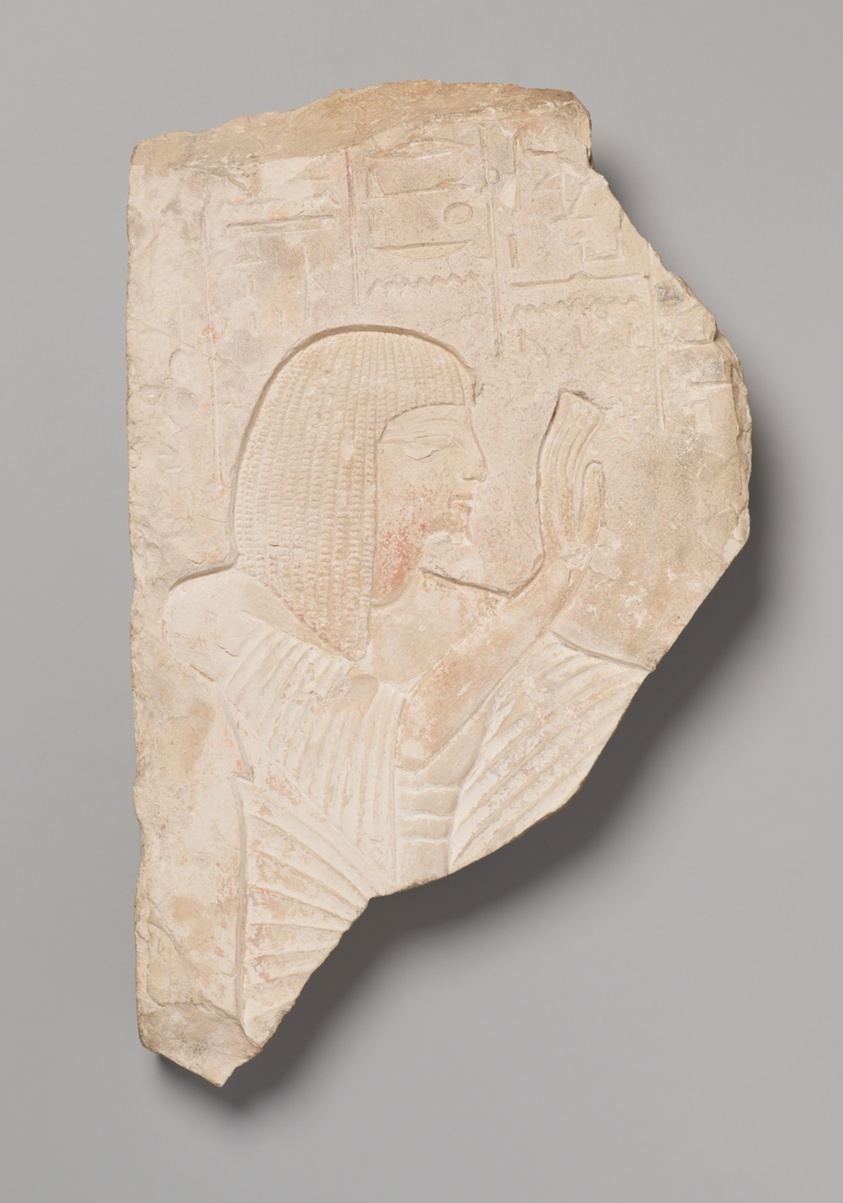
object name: Architectural fragment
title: Fragment of a Stela of Neferhotep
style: new kingdom, nineteenth dynasty, ancient, egyptian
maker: Egyptian; probably Theban Tomb 216, Deir el-Medina, Egypt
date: New Kingdom, mid-Dynasty 19, about 1240-1195 BCE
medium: Limestone and pigment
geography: Egypt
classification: Stelae; architectural fragment; stone; sculpture; ancient art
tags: portraits, praying, Hieroglyphs, men